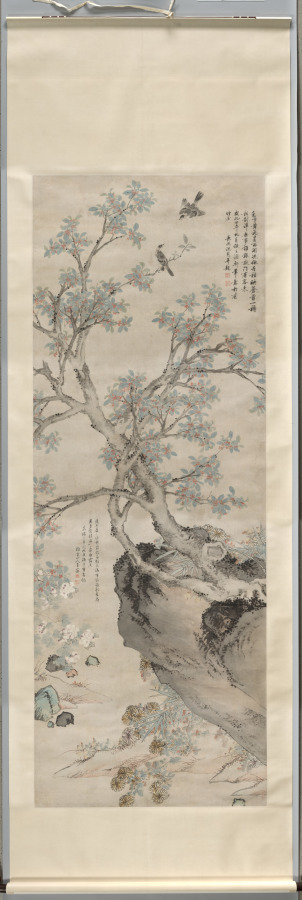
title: Yellow Chrysanthemums and Red Osmanthus in the Style of Wang Yuan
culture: China, Ming dynasty (1368–1644)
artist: Shen Zhou (Chinese, 1427–1509)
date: 1468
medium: hanging scroll, ink on paper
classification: Painting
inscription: Artist's inscription, signature, and 2 seals at upper right: Beneath the fence yellow [chrysanthemum] flowers brave the rain to blossom;/ Still others lean on the red osmanthus tree and dazzle the deep green moss./ With a goblet [of wine] I face them, entirely without concern;/ Who will answer the knocking at the gate where a guest has arrived? In the ninth month of the fourth year of the Chenghua era [1468], I followed the brush-conception of Wang Danxuan 王澹軒 [Wang Yuan 王淵] at the Youzhuzhuang 有竹庄 [House with Bamboo]. Inscribed and [painted] by Shen Zhou 沈周 of Changzhou 長洲. [seals] Shitian 石田; Shen shi Qinan 沈氏启南. trans. HR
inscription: 1 additional inscription, dated 1523, and 2 seals of Wang Chong 王寵 (1494-1533).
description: Shen Zhou, a native from Suzhou, was descended from a prominent land-owning family with strong ties to literati culture. Because Shen Zhou never entered government service, he had ample opportunity to cultivate the arts of painting, poetry, and calligraphy. Chrysanthemums and red osmanthus both bloom in autumn. The deep orange osmanthus flowers emanate a characteristically sweet fragrance. According to his inscription on the painting, Shen Zhou sought to imitate the style of the Yuan dynasty (1271–1368) painter Wang Yuan. His color-filled brushstrokes and washes, however, anticipate the flower painting style of Yun Shouping, whose Peonies are also in the Cleveland Museum of Art collection, https://www.clevelandart.org/art/1967.192. The sheer size and complex composition of this scroll are impressive.